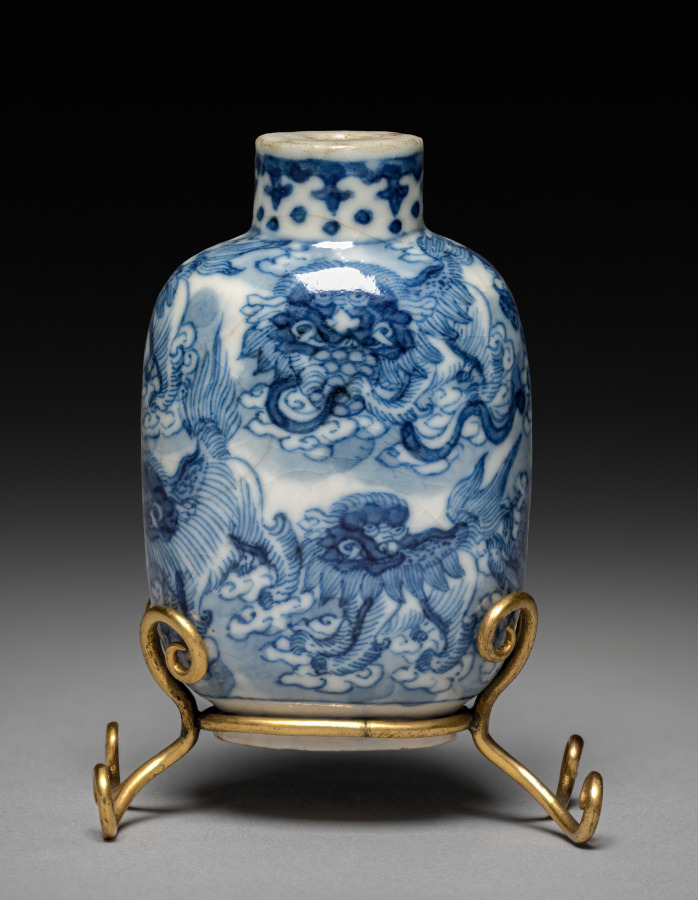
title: Flattened Ovoid Snuff Bottle with Stopper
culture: China, Jiangxi province, Jingdezhen kilns, Ming dynasty (1368-1644), Wanli reign (1572-1620)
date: 1573–1620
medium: porcelain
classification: Ceramic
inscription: 萬曆年製